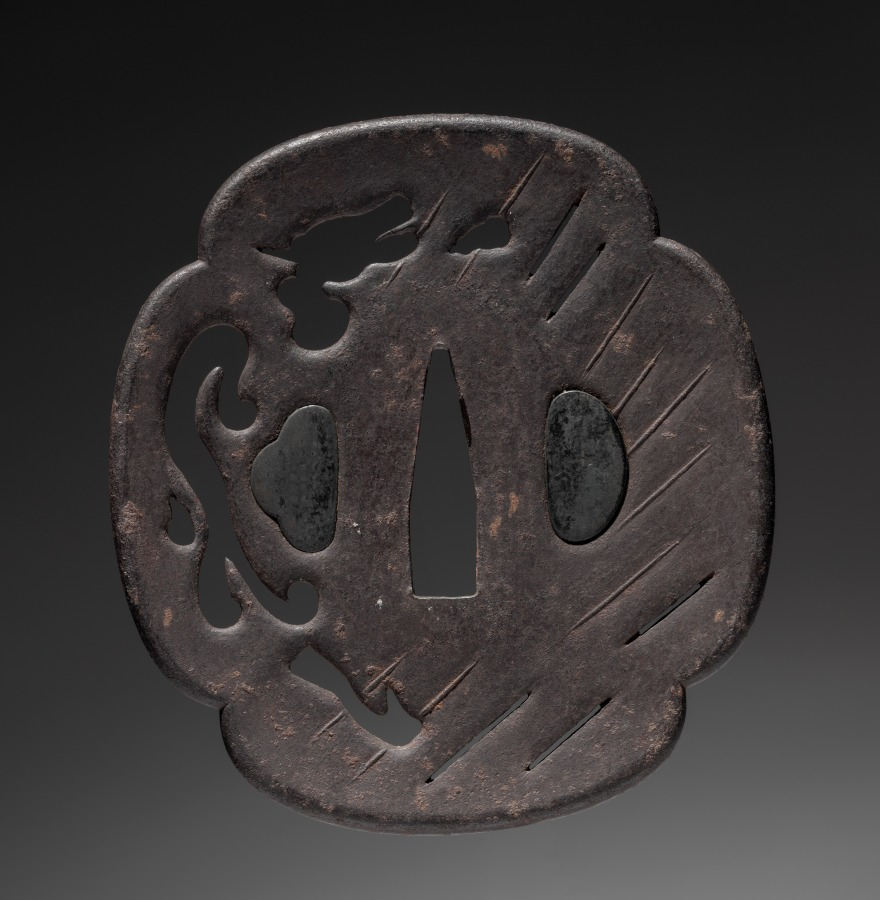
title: Sword Guard (Tsuba)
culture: Japan, possibly Edo period (1615-1868)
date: c. 1615–1868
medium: iron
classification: Arms and Armor